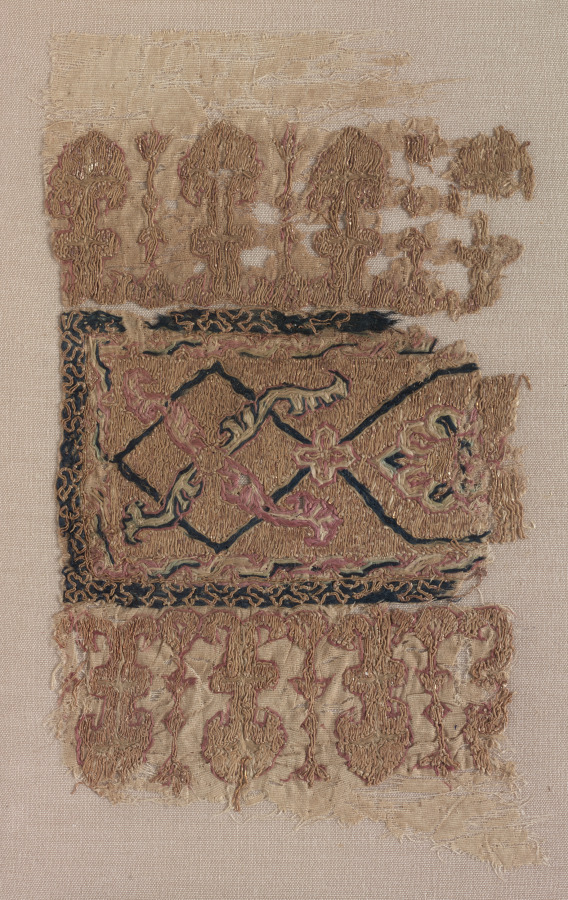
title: Fragment of an Embroidery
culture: Iran or Iraq, Seljuk period, 12th century A.D.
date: 1100s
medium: embroidery in silk and gold filé on mulham tabby ground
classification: Embroidery